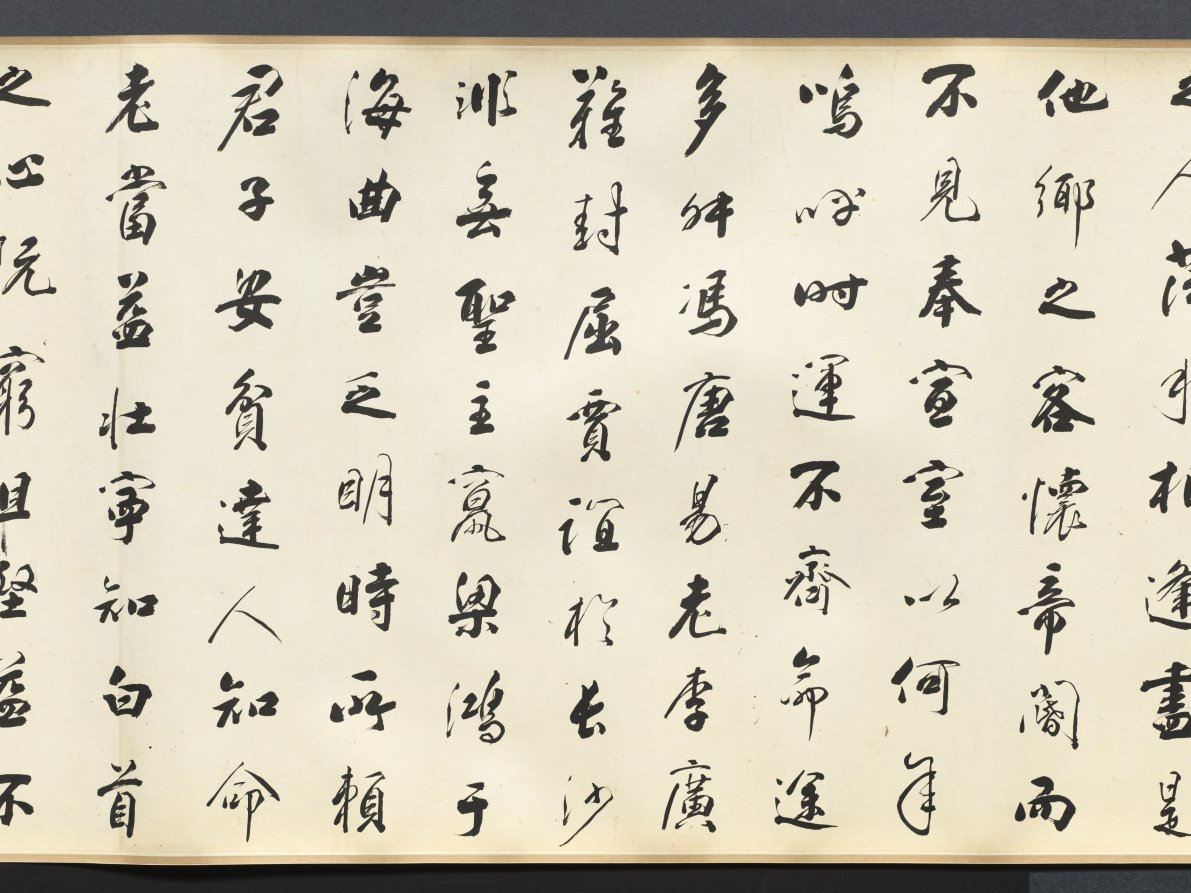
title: Calligraphy in Running Style based on Wang Bo's Essay on Tengwang Pavilion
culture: China, Changbai, Qing dynasty (1644-1911)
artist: Tiebao (Chinese, 1752–1824)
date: 1811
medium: handscroll, ink on paper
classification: Calligraphy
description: A member of the Donggo clan, Tiebao belonged to the Manchu Plain Yellow Banner army. As an official in the Qing court, he endured considerable vicissitude and his career was never smooth. Celebrated as a man of letters, he oversaw the publications of the Manchu military system as well as an anthology of poems by members of the imperial family and other Manchu dignitaries. In calligraphy, he was regarded as the equal of such eighteenth-century luminaries as Liu Yong (1720-1805) and Weng Fanggang (1733-1818). This handscroll is a work of his mature years and is exemplary of his disciplined and highly subtle approach to the art of calligraphy.